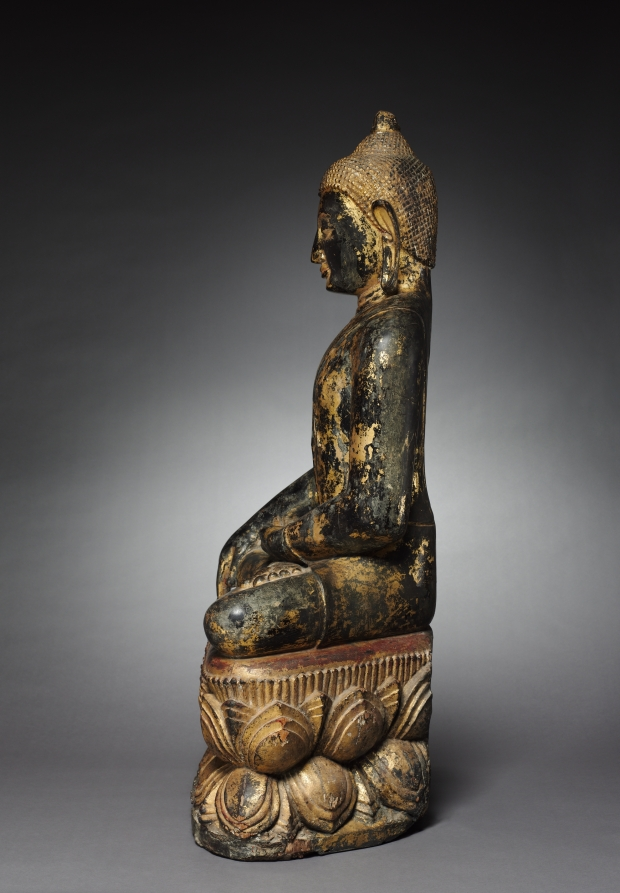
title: Seated Buddha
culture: Burma (Myanmar)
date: 1100s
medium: Gilt lacquer on solid wood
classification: Lacquer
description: This rare image of the historical Buddha Shakyamuni is shown seated with crossed legs in the position of meditation. His left hand rests on his lap, referring to his meditation under the Bodhi tree, and his right hand is in the earth-touching gesture—calling the earth to witness his enlightenment. The Buddha sits on a double lotus pedestal that indicates the presence of a transcendent being. The sculptural style is typical of sculptures made at the Buddhist site of Pagan. Sculptures such as this were installed in niches in an interior passage of a temple. As is typical of Burmese works, this sculpture was carved from a solid piece of wood. Its surface was covered in black lacquer and then gilded; a great deal of the gilding remains intact. Because lacquer is an easily perishable material, works of this type and size are exceedingly rare; this sculpture is one of the best extant examples.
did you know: The parallel lines with heart-shaped ends near the Buddha's ankles are the rippling pleats of his garment's hem.